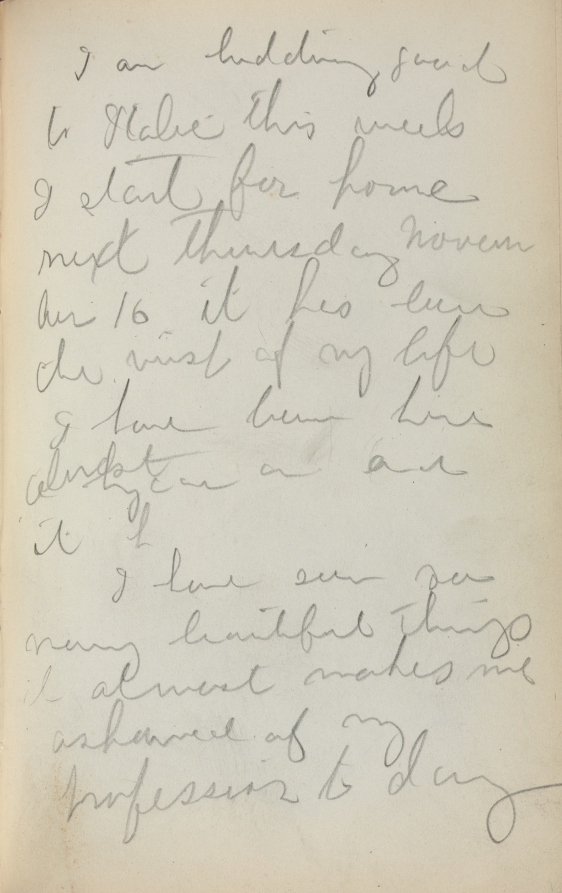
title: Italian Sketchbook: Notes (page 97)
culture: America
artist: Maurice Prendergast (American, born Newfoundland [now Canada], 1858–1924)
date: 1898–1899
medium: pencil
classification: Bound Volume